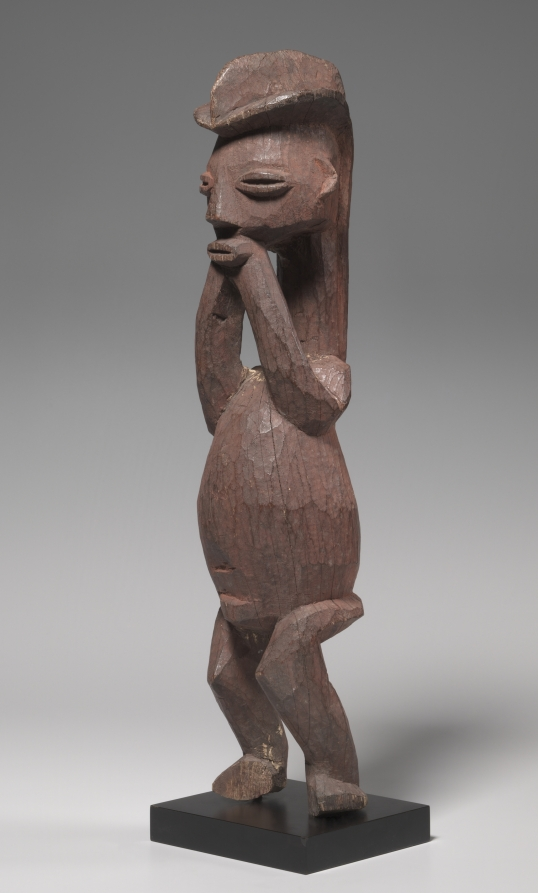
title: Male Figure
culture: Africa, Central Africa, Democratic Republic of Congo, Hungaan-style maker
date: mid- to late 1800s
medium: Wood and colorant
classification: Sculpture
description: Hungaan figures of this size served as guardians of ritual shrines and functioned in rituals to promote fertility, guarantee well-being, and ensure longevity. The striking crested hairstyle imitates a real coiffure or a wig, indicative of status and prestige. The hands supporting the chin identify the figure as a chief who is immersed in thought and contemplation, pondering over his responsibilities.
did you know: The red powdery surface of this figure mimics a red body adornment that mixed ground camwood with palm oil.